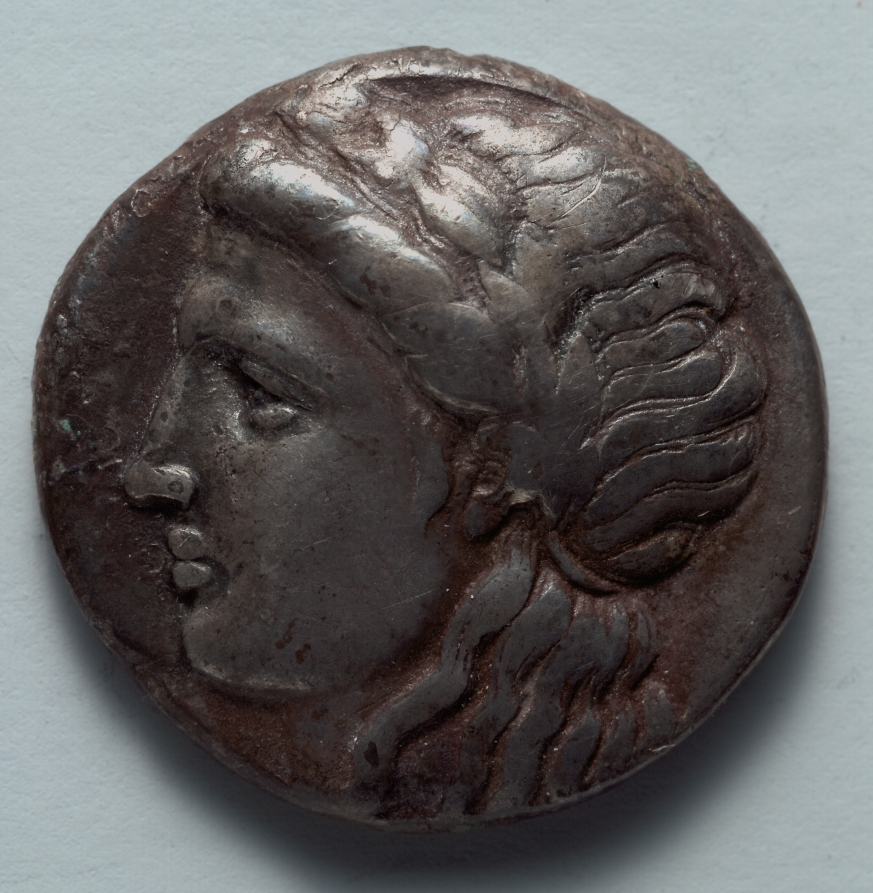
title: Tetradrachm: Head of Apollo, l., laureate (obverse)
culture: Greek, minted at Miletos (Ionia)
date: c. 334–323 BCE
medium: silver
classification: Coins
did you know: The lion and star on the reverse connect to the sun god, Apollo, shown here.